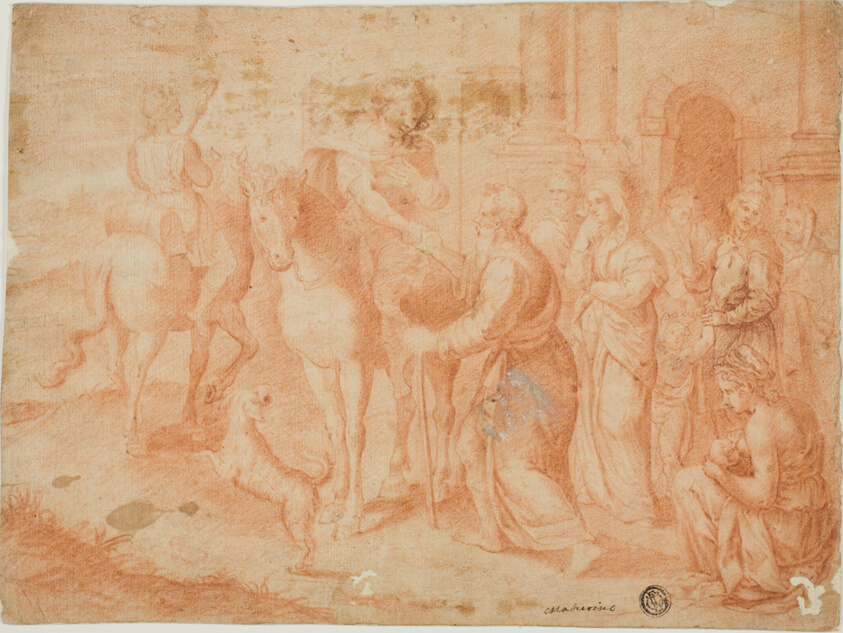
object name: Drawing and Watercolor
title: Departure of Tobias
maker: Unknown Artist; Italian, late 16th century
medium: Red chalk on tan laid paper, laid down on ivory laid paper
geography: Italy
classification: chalk; drawings (visual works); prints and drawing